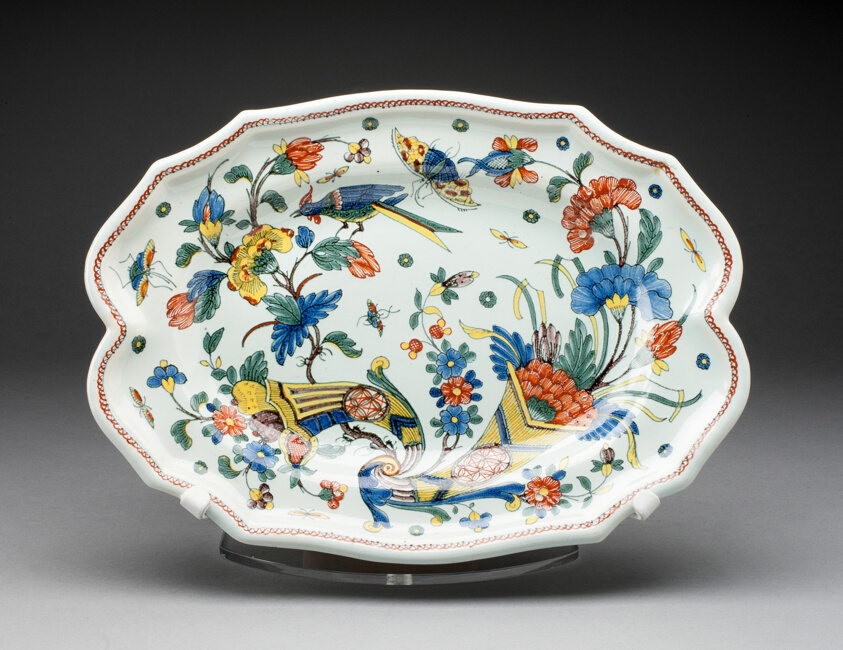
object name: Ceramics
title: Platter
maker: France, Rouen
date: c. 1760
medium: Tin-glazed earthenware (faience)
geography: Rouen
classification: vessel for serving food; dish (vessel); tin-glazed ware; earthenware; european decorative arts; ceramics